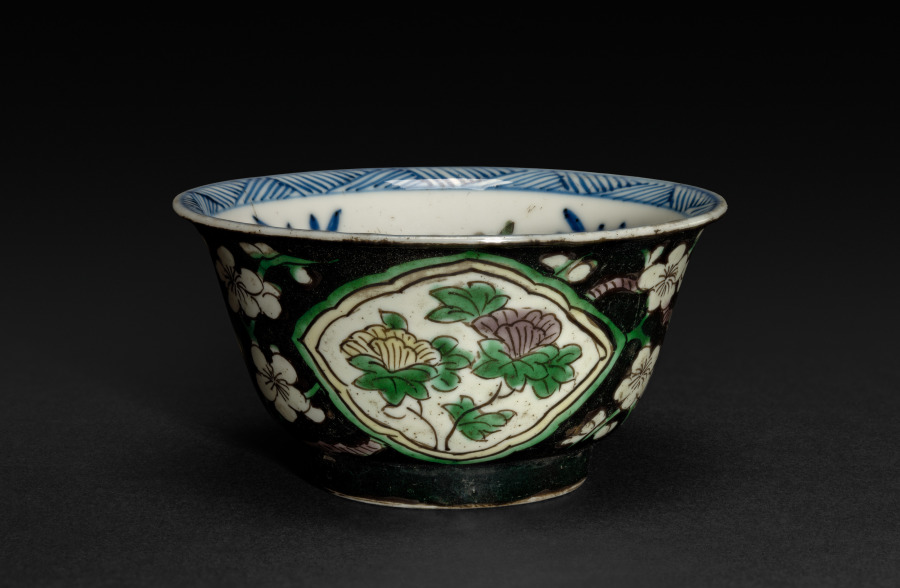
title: Cup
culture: China, Qing dynasty (1644-1911), Kangxi reign (1662-1722)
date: 1662–1722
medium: porcelain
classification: Ceramic